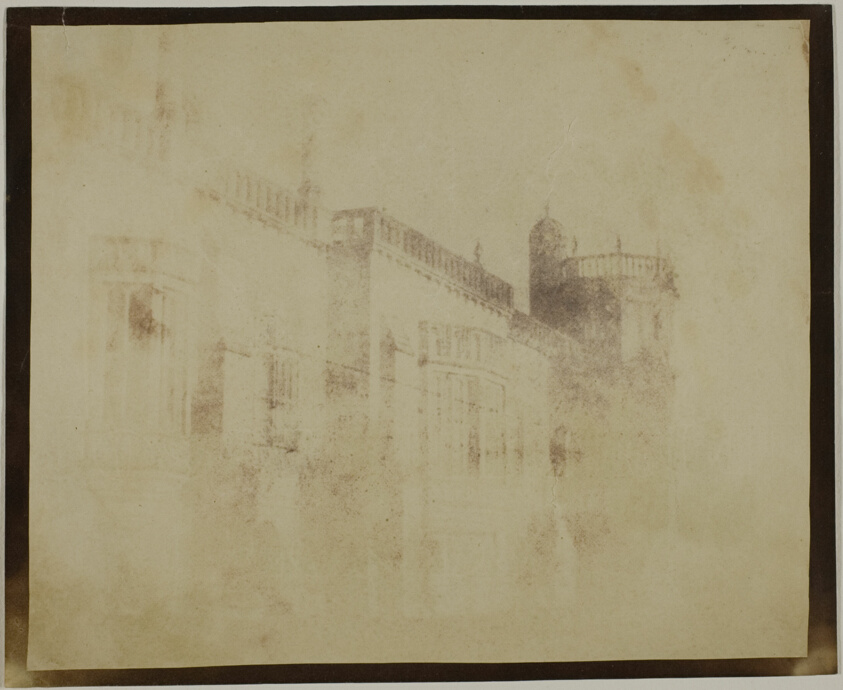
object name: Photograph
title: Lacock Abbey, South Front Towards Sharington's Tower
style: 19th century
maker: William Henry Fox Talbot (English, 1800–1877)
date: March 17, 1840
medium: Calotype print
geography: England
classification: salted paper print; photographic process; photography; photograph